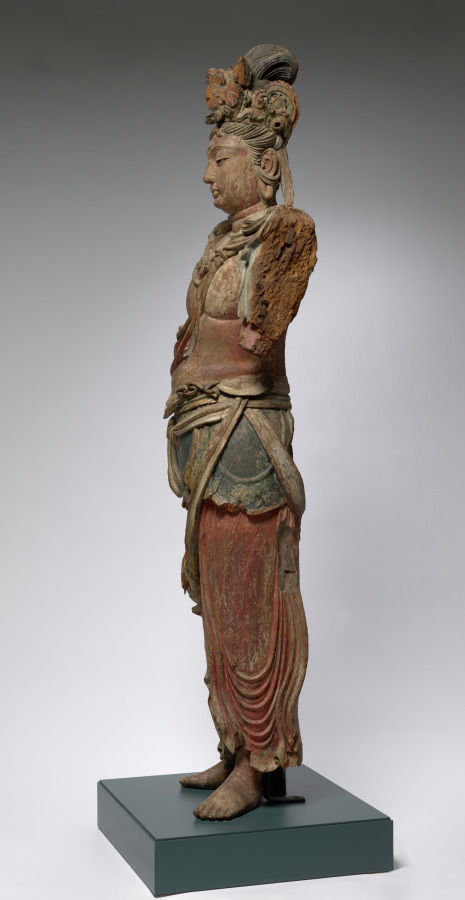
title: Eleven-Headed Guanyin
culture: China, late Northern Song dynasty (960-1127) - Jin dynasty (1115-1234)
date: 1100–1200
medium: wood with polychromy and cut gold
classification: Sculpture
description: The bodhisattva is an enlightened being dedicated to the spiritual awakening of all beings. The compassionate bodhisattva Guanyin, in a variety of manifestations, is probably the most popular deity of worship in Chinese Buddhism. In the Esoteric Buddhist form shown here, this standing Guanyin has a total of eleven heads, with smaller ones above the principal head. The uppermost head represents the Buddha Amitabha, to whom he is closely related. The eleven heads symbolize the Buddha’s steps on the path to enlightenment.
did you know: This Guanyin is carved from a single block of willow (genus Salix sp.).